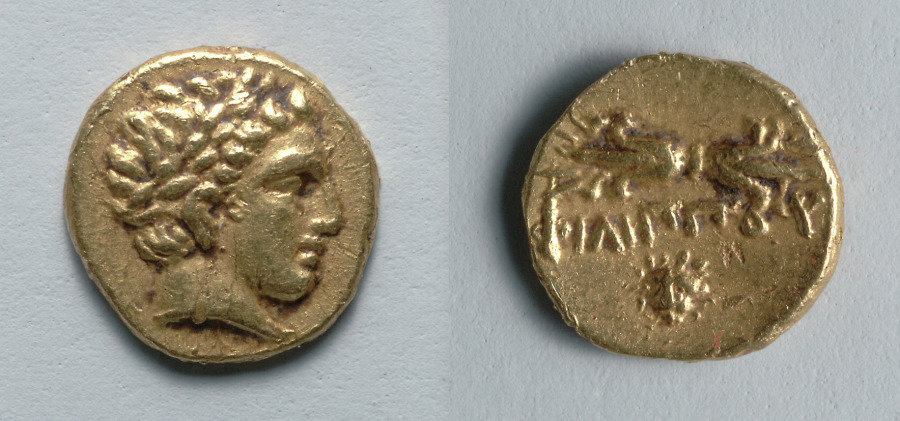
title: Obol: Head of Apollo (obverse); Thunderbolt (reverse)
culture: Greek, Macedonian, minted at Pella (Macedonia), reign of Philip II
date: c. 345–336 BCE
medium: gold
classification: Coins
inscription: ΦΙΛΙΠΠΟΥ